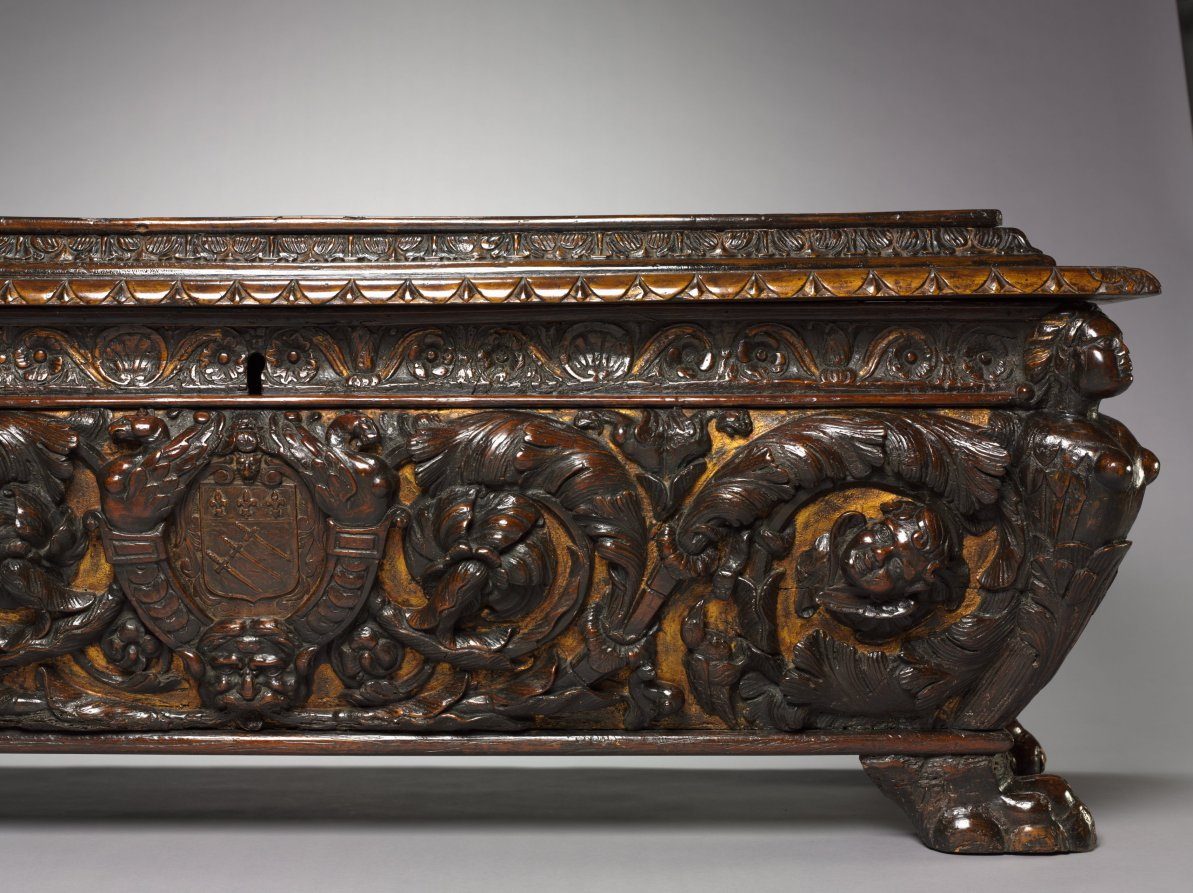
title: Marriage Chest (Cassone)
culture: Italy, early 16th century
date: early 1500s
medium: walnut with traces of gilding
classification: Furniture and woodwork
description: Large storage chests resembling ancient Roman burial vaults-a popular collectible among wealthy families during the Renaissance-were often associated with an important marriage and contained the wife’s dowry of clothes and precious objects. This particular example displays the arms of the Spada Family of Rome amidst a richly carved façade on a gilded ground. Sometimes cassoni were carried in the marital procession from the bride’s home to that of her future husband, emphasizing the power and wealth of both families.